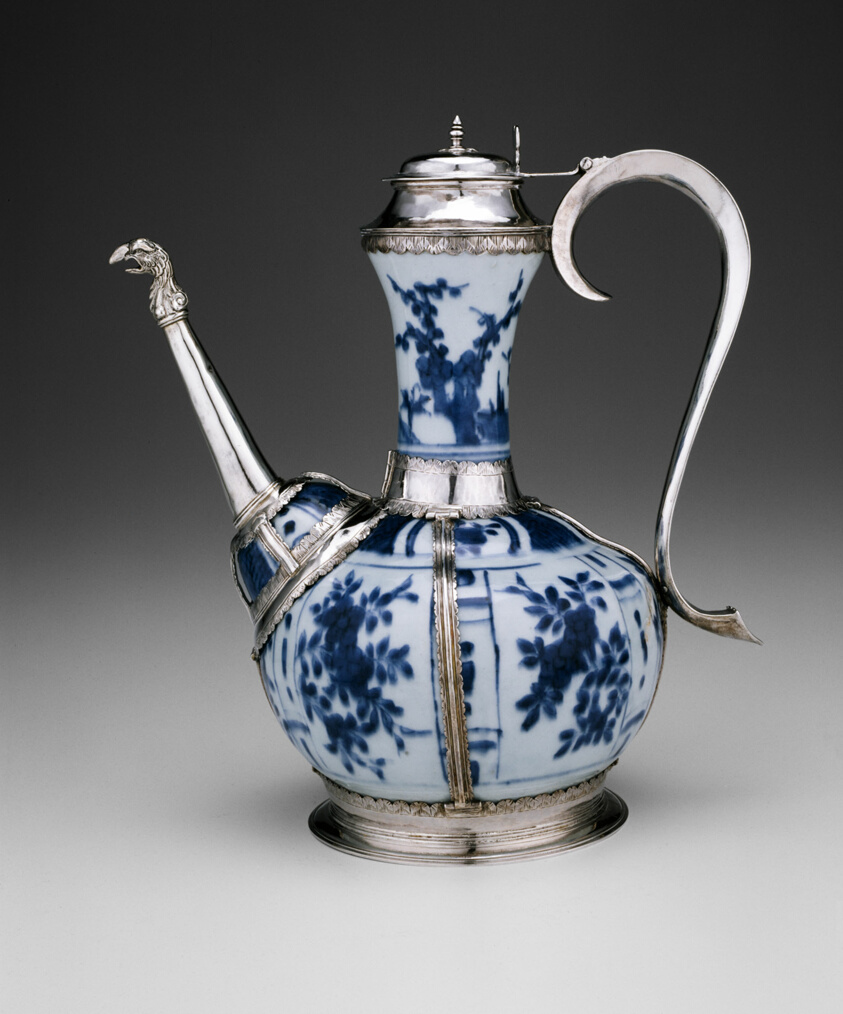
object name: Ceramics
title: Ewer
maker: Porcelain: China, Ming dynasty (1368–1644), Wanli period (1573–1620); Mounts: London, c. 1610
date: c. 1610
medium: Porcelain, underglaze blue, and silver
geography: China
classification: ewer (vessel); vessel; porcelain; european decorative arts; ceramics